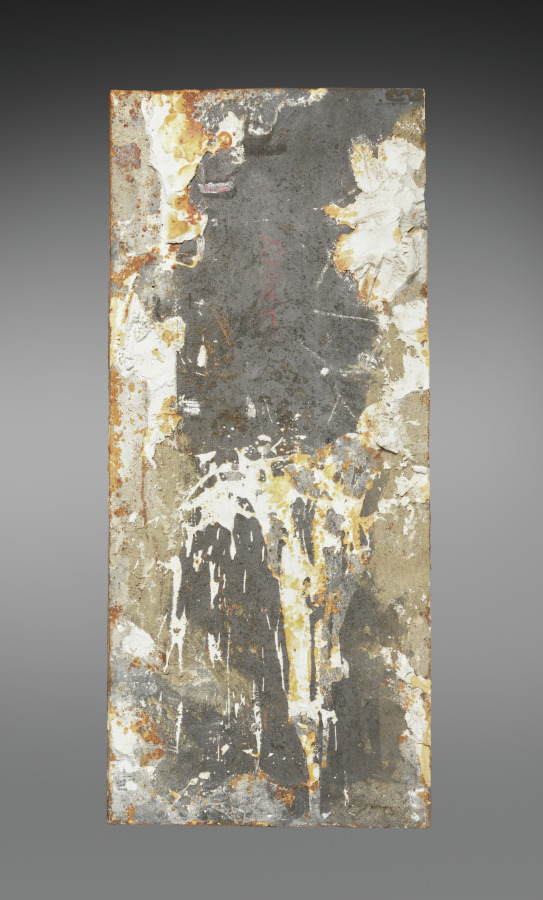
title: Set of Fire Linings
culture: France, style of Louis XVI, 18th Century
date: c. 1770–1780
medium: cast iron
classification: Furniture and woodwork